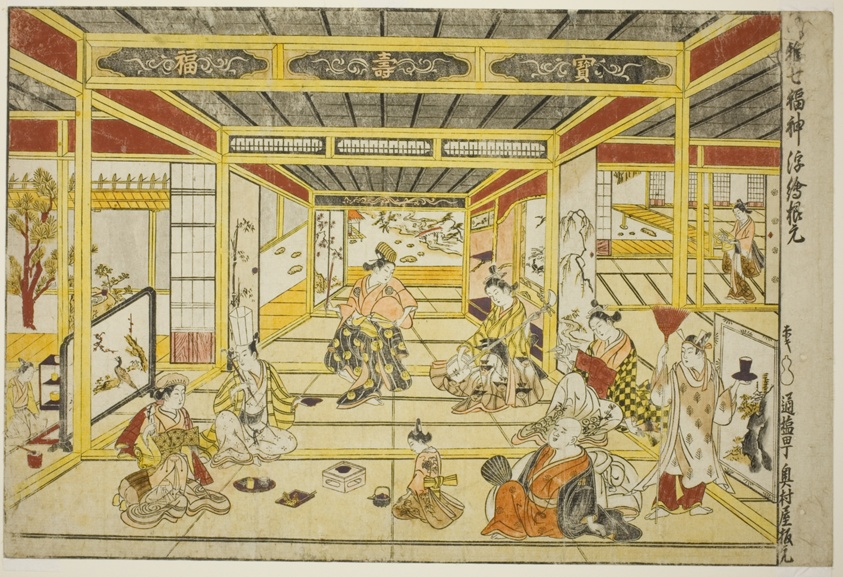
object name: Print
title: Original Perspective Picture of the Fashionable Seven Gods of Good Fortune (Furyu shichi fukujin uki-e kongen)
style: Japanese (culture or style)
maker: Okumura Masanobu (Japanese, 1686-1764)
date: 1740s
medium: Hand-colored woodblock print; o-oban, beni-e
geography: Japan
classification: woodblock print; print; asian art